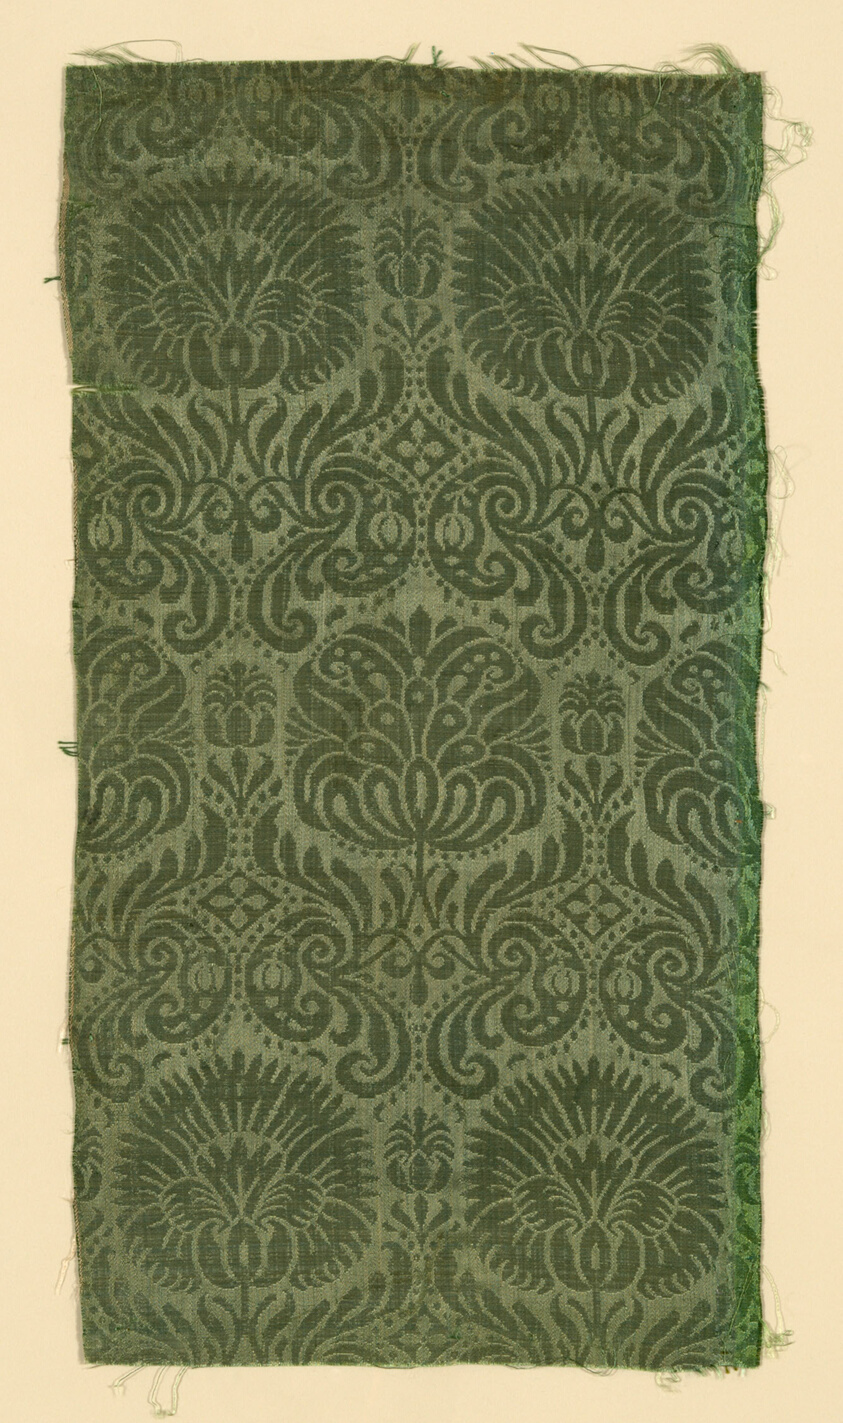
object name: Textile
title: Fragment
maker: Italy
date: 1575/1600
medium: Silk, warp-faced satin weave self-patterned by plain weave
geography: Italy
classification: textile; weaving